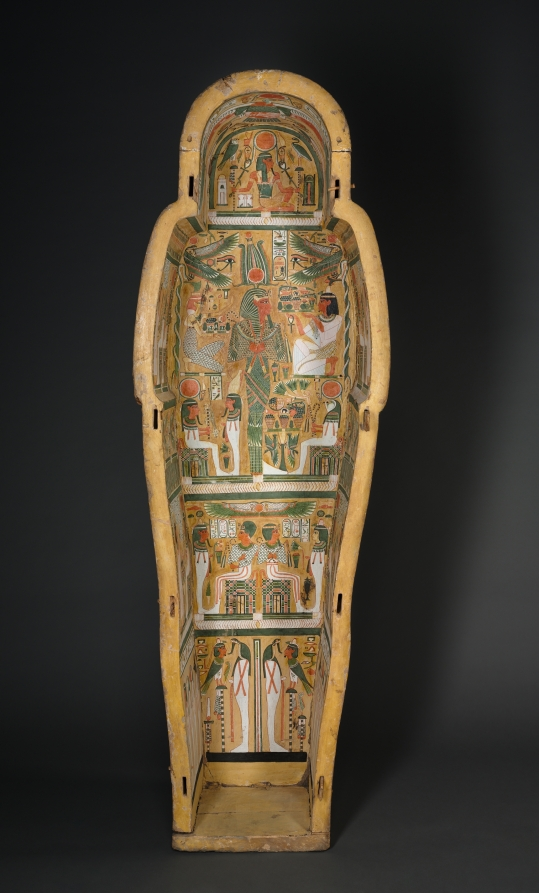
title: Coffin of Bakenmut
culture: Egypt, Thebes, Third Intermediate (1069–715 BCE), Dynasties 21–22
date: c. 1000–900 BCE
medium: gessoed and painted sycamore fig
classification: Funerary Equipment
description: The coffin of Bakenmut is one of the finest examples of painted wooden coffins made for the priests of Amen and their families at Thebes during Dynasty 21 and early Dynasty 22. The pharaohs of this time were no longer buried in the Valley of the Kings, but instead built tombs in the Delta, far to the north, where they resided. Security was lax in the Theban necropolis. The coffins and funerary goods of the wealthy citizens of Thebes were placed in unmarked and undecorated family tombs cut into the cliffs on the west bank of the Nile. All the care and detail that in more prosperous times were devoted to the decoration of the tomb chapel were now lavished on the elaborately painted coffins. Every available surface is crowded with religious scenes, images of funerary gods and goddesses, protective spells, and magical symbols. The deceased appears mummiform. An elaborate floral collar entirely covers the upper body, exposing only the separately attached hands (now lost). A pair of red "mummy braces" are crossed over the chest, their point of intersection marked by a winged sun disk. The lower body is covered with tiny figures modeled in gesso against a yellow background, which gives the effect of gold inlaid with glass or semiprecious stone. The decoration on the interior features two deified dead kings of Dynasty 18. Although these rulers had lived centuries before, memory of their greatness was still very much alive. The main scene near the top depicts Tuthmosis III, the great military pharaoh, who lived 500 years before Bakenmut. Posed as a mummy, the ruler wears a brilliant feathered garment enfolding him with falcon’s wings. The scene below features back-to-back seated images of Amenhotep I, regarded as the patron of the Theban cemetery and worshiped as a local god there.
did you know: Originally another smaller coffin was placed inside this outer coffin and in that the deceased with a mummy board would have rested.